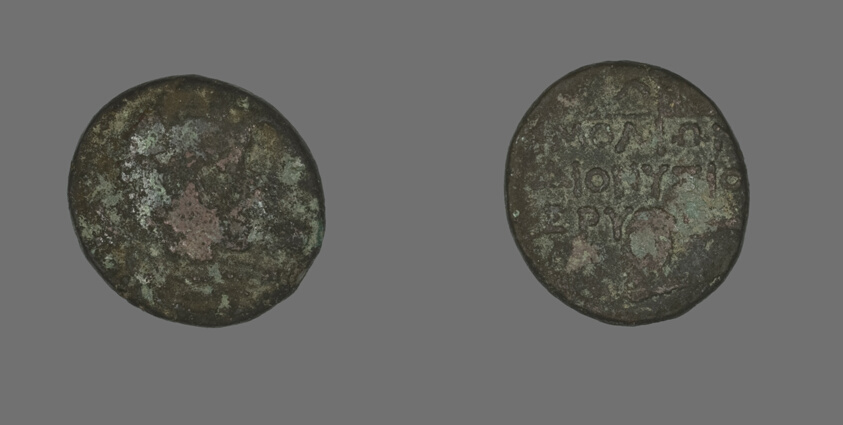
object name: Coin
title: Coin Depicting the Hero Herakles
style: greek, ancient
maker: Greek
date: 200-133 BCE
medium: Bronze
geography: Ancient Greece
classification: coin; ancient art